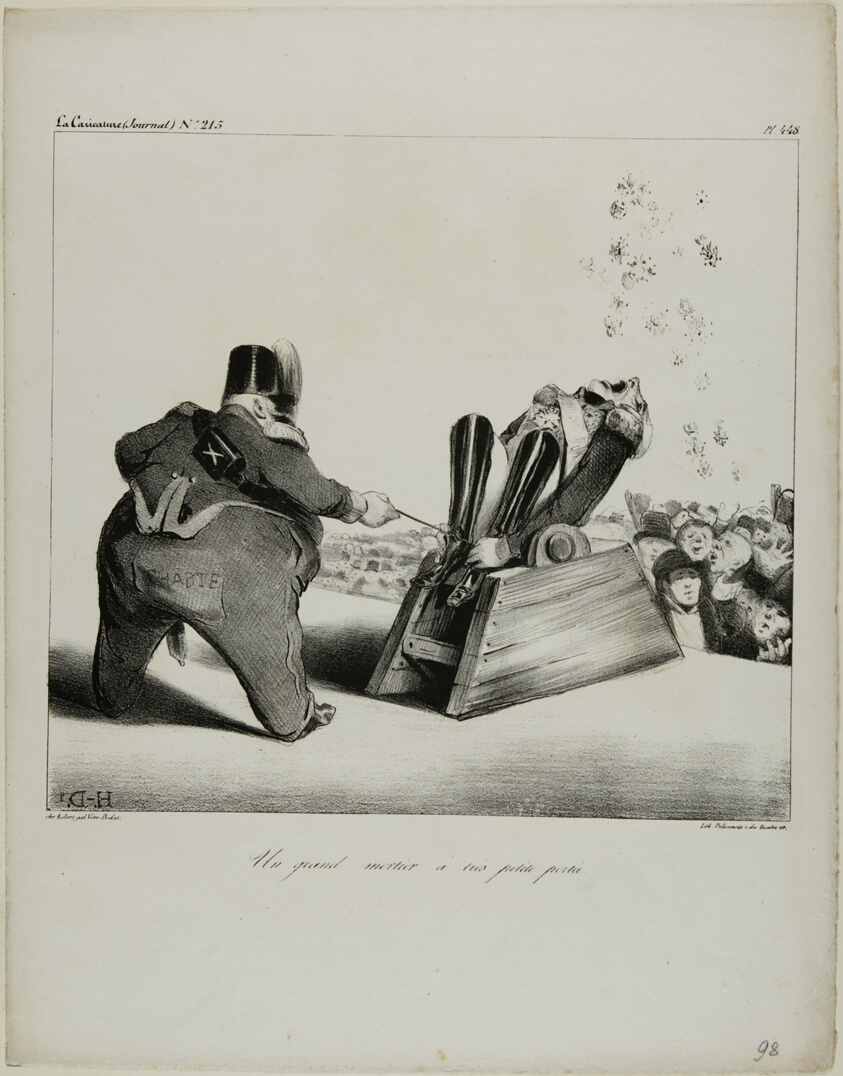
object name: Print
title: A large mortar with a short range, plate 488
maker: Honoré Victorin Daumier; French, 1808-1879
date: 1834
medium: Lithograph in black on ivory wove paper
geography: France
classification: lithograph; print; prints and drawing